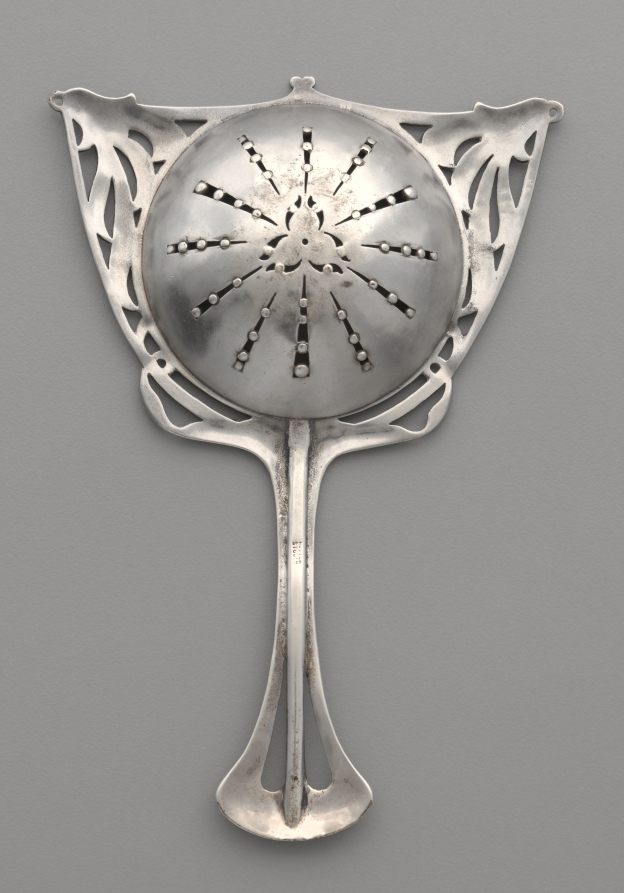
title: Tea Strainer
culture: America, Ohio, Cleveland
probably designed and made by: Horace Potter (1873–1948)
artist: and Potter Studios (American)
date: c. 1910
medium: silver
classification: Silver